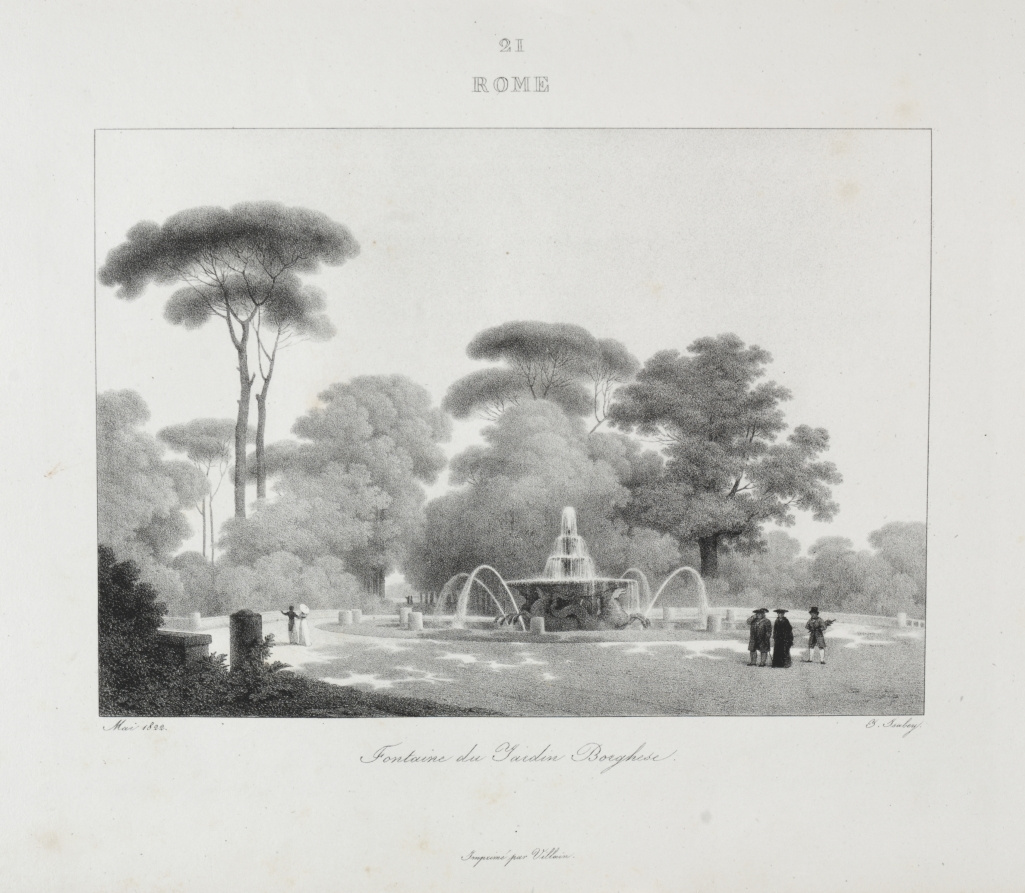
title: Voyage en Italie en 1822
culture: France, 19th century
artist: Jean-Baptiste Isabey (French, 1767–1855)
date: 1833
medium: lithograph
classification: Bound Volume